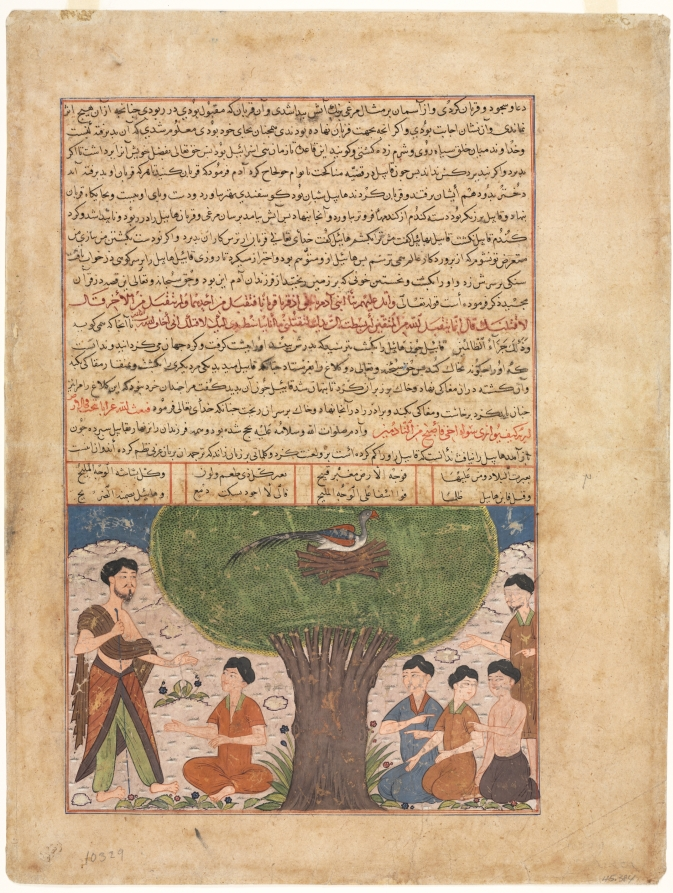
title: The Story of Adam, peace upon him, his Sons and Progeny, from a Jami al-tavarikh (Compendium of Chronicles) of Rashid al-din (verso)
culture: Afghanistan, Herat, Timurid period (1370–1501)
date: c. 1425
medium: opaque watercolor and ink on paper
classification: Manuscript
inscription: Script: Naskh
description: This illustrated page from a history book depicts a scene from the narrative of Adam and Eve, expanding on the story as it is recorded in the Qur'an. According to the text, among Eve’s many children were two sets of twins: Cain and his sister Iqlima, and Abel and his sister Labuda. When Cain objected to Adam’s decision that Iqlima should marry Abel, Adam decreed that the brothers should settle the matter by making sacrificial offerings. A divine fire in the form of a bird appeared and chose Abel’s offering of a good lamb over Cain’s offering of bad wheat. Cain then vowed to kill Abel, and proceeded to commit fratricide.